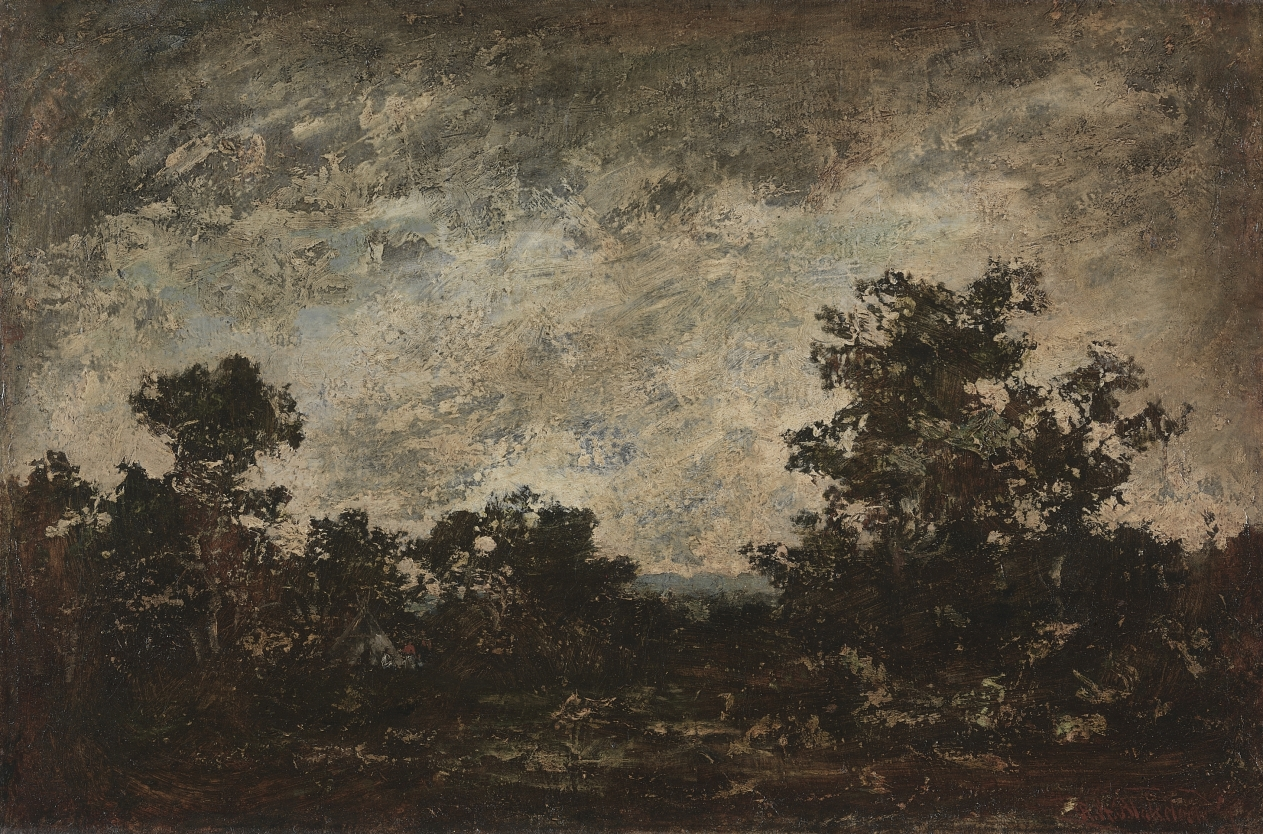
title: Indian Camp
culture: America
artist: Ralph A. Blakelock (American, 1847–1919)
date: c. 1890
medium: oil on canvas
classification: Painting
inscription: signed lower right: R. A. Blakelock.